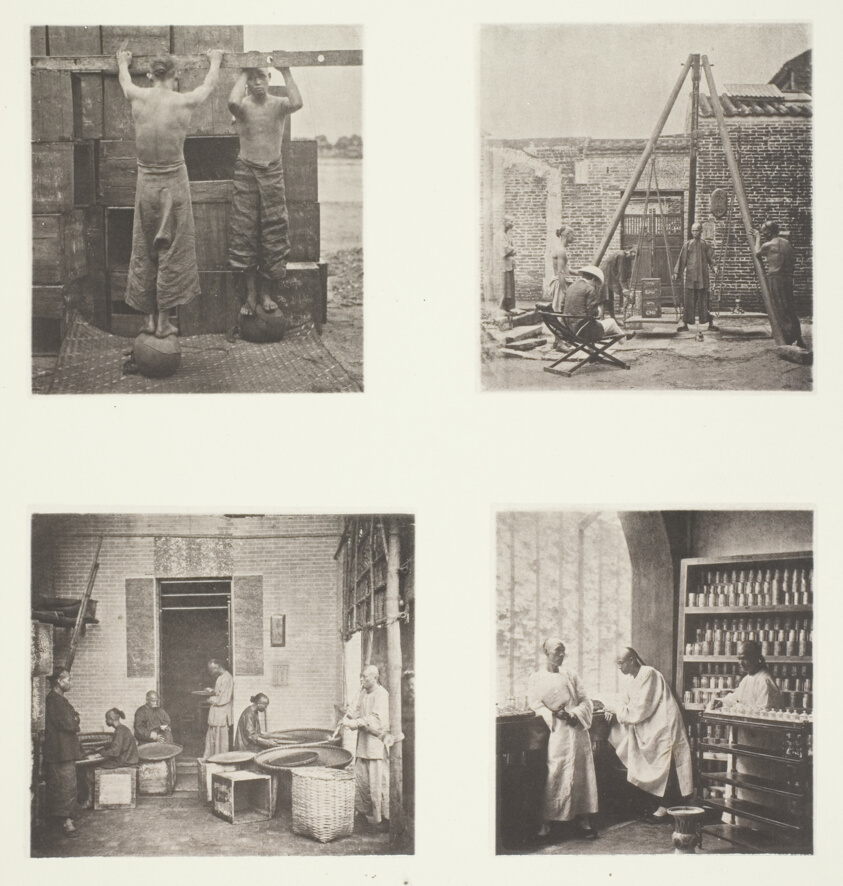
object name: Photograph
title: Rolling Scented Caper and Gunpowder Teas; Weighing Tea for Exportation; A Tea House, Canton; A Tea-Tasting Room, Canton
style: 19th century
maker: John Thomson (Scottish, 1837–1921)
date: c. 1868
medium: Collotype, pl. XXI from the album "Illustrations of China and its People, Volume I" (1873)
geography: Scotland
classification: photography; photograph